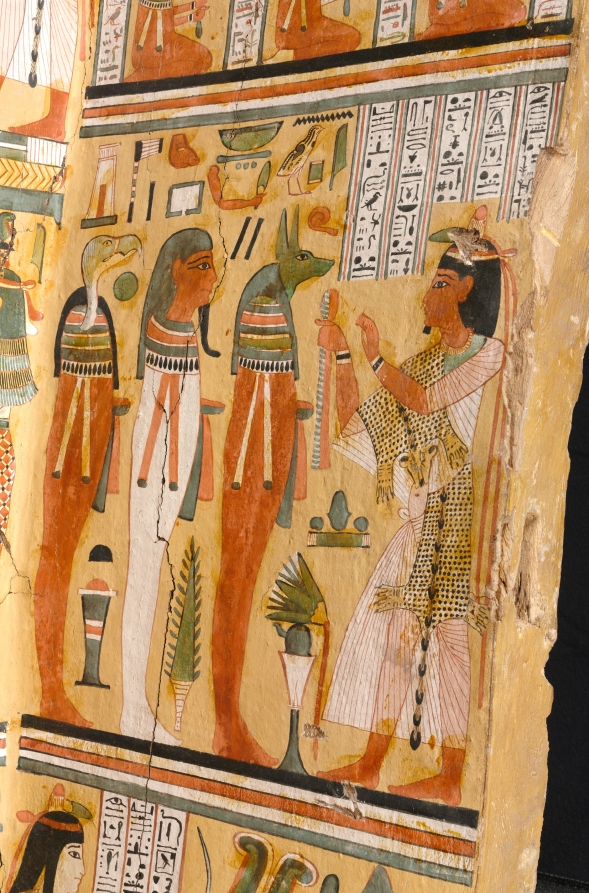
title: Coffin of Nesykhonsu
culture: Egypt, Thebes, Third Intermediate (1069–715 BCE), Dynasties 21–22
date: c. 976–889 BCE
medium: gessoed and painted sycamore fig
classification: Funerary Equipment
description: Egyptian coffins told stories and illustrated spells to help the deceased transition safely to the afterlife. Inside Nesykhonsu's coffin there are two jackals, one facing right and the other left, near the top. Here, the jackal represents the powerful deity Anubis, the god of the afterlife and embalming.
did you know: Two of Nesykhonsu's titles, "Lady of the House" and "Singer of the Choir of Mut the Great," are written on the outside of the coffin.